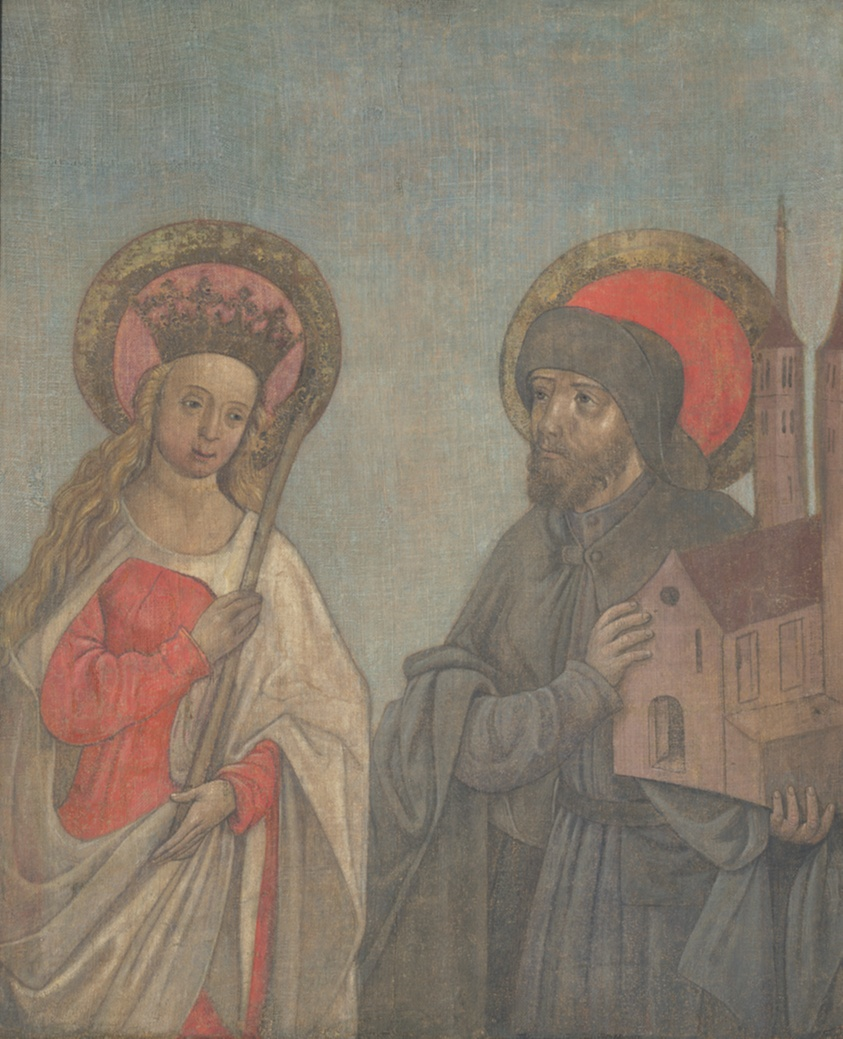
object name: Painting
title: Diptych of Saints Achatius, Barbara, Apollonia, and Sebald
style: 15th century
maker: German; Franconia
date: c. 1490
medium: Distemper on linen, mounted on panel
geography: Germany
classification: painting; paint; german; european painting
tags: saints, Christian subjects, Christianity, church, crowns, Devotion, Germany, men, religion, religious, tower, women